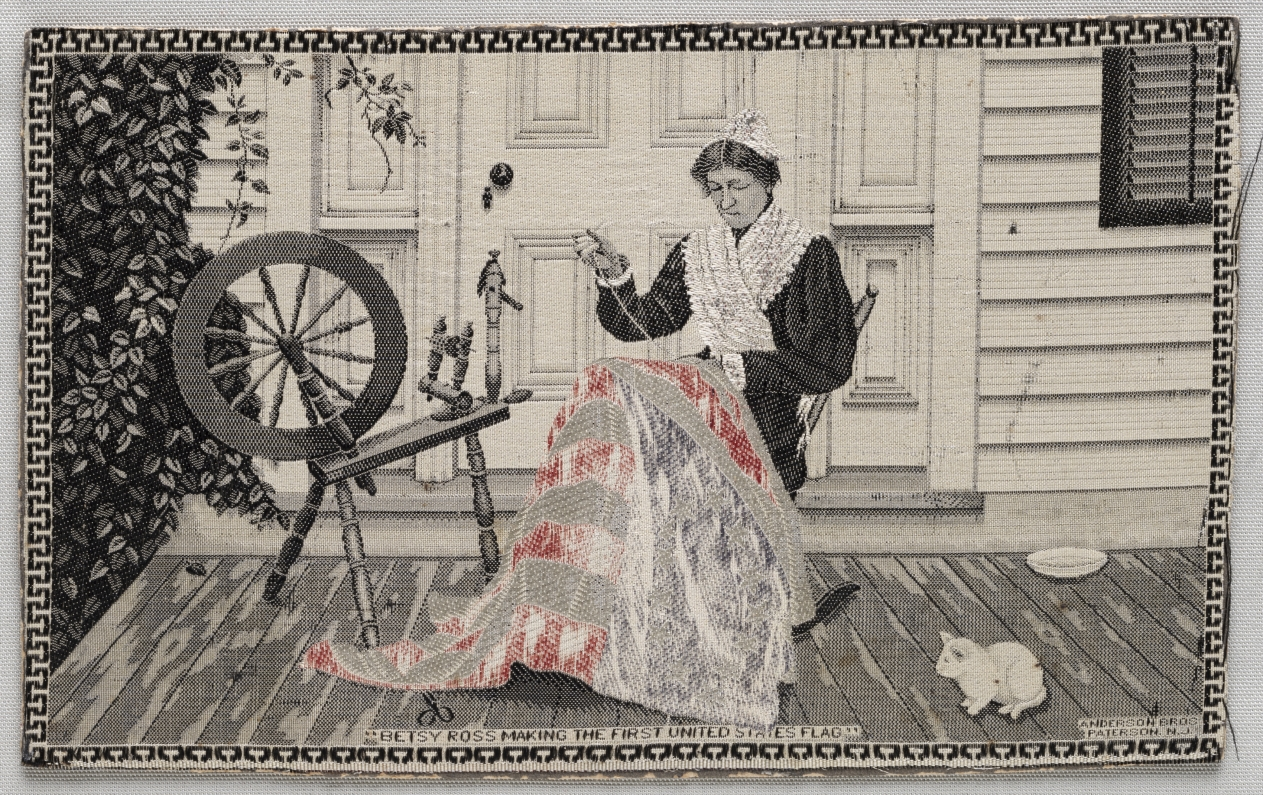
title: Betsy Ross Making the First United States Flag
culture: America, New Jersey, 20th century (?)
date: 1900s (?)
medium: jacquard weave silk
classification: Textile